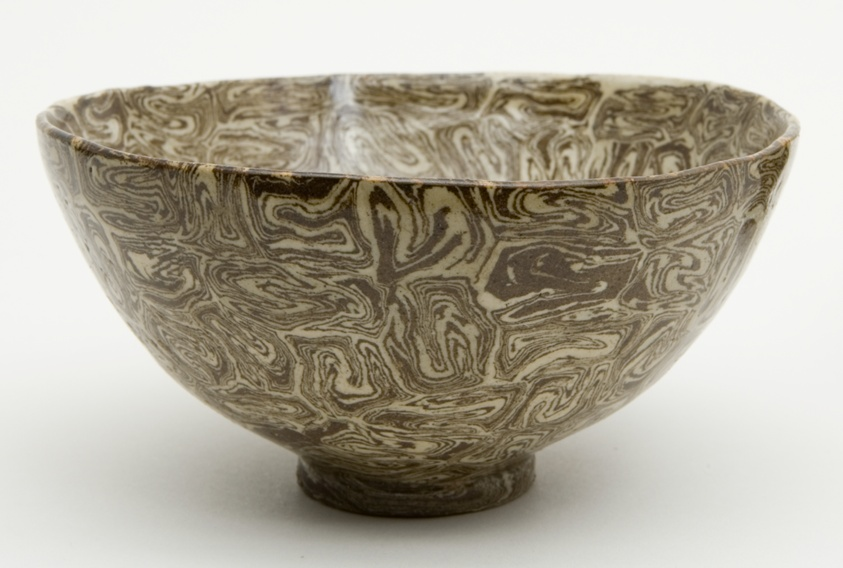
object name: Vessel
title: Bowl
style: Chinese (culture or style)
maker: China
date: Song dynasty (960–1279)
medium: Marbled earthenware with clear glaze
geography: China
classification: bowl; dish (vessel); vessel